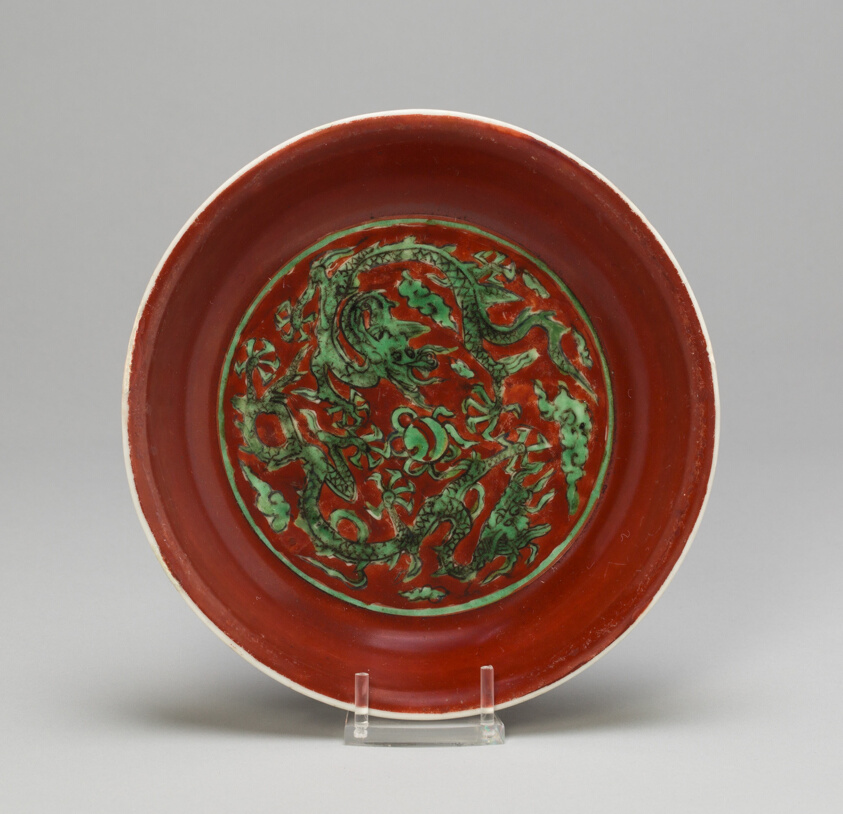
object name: Vessel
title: Dish with Paired Dragons, Cloudscrolls, and Flaiming Pearl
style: Chinese (culture or style)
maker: China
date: Ming dynasty (1368–1644), Jiajing reign mark and period (1522–1566)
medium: Porcelain painted in overglaze green and red enamels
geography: China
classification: dish (vessel); porcelain; asian art; ceramics; vessel